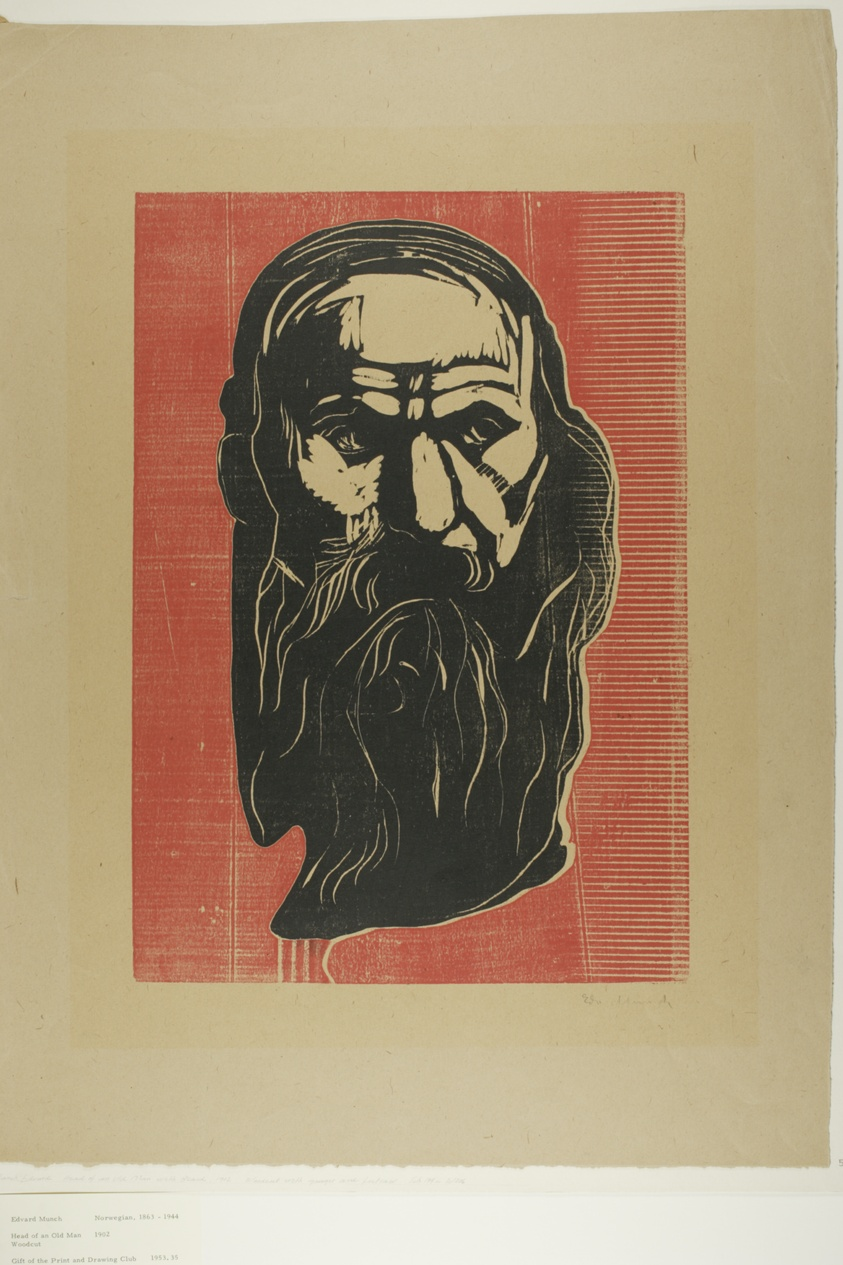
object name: Print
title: Head of an Old Man with Beard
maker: Edvard Munch (Norwegian, 1863-1944)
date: 1902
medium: Color woodcut on paper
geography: Norway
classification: woodcut; print; prints and drawing